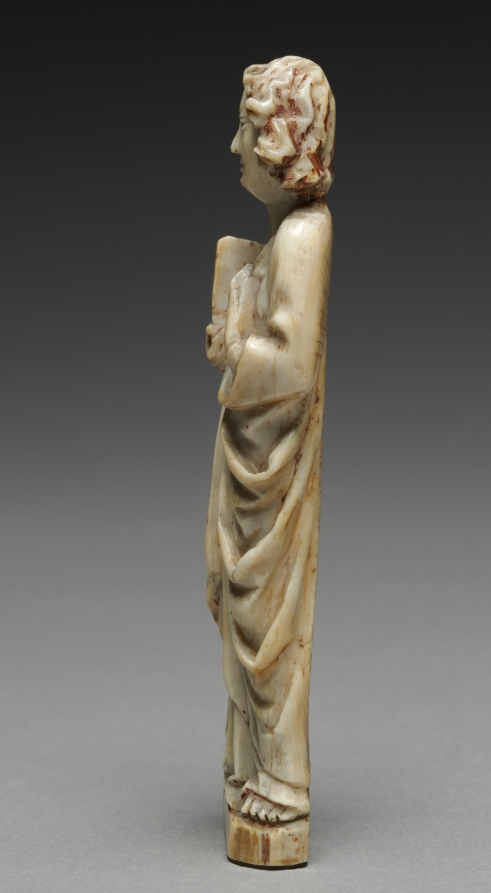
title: Saint John the Evangelist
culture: Germany or Moravia, 14th century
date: c. 1325–1330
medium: ivory with traces of paint and gilding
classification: Ivory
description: This figure with a Virgin and Crucified Christ (now lost) formed a Crucifixion group within a shrine.